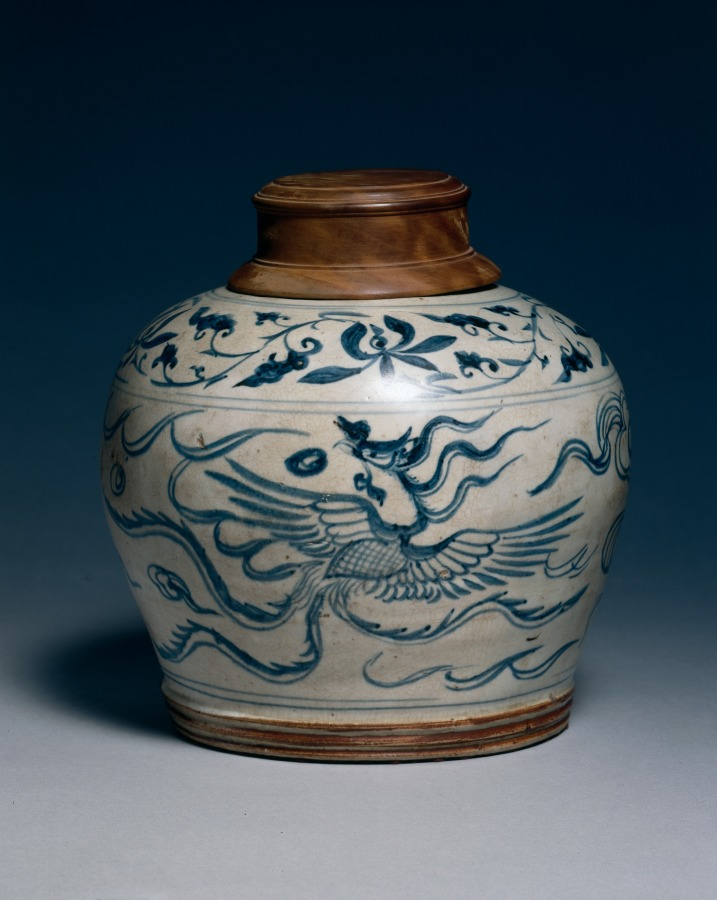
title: Covered Jar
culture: Vietnam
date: 1500s–1600s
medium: stoneware with blue and white decoration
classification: Ceramic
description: This stoneware ginger jar is decorated with a blue and white phoenix among clouds (a symbol of longevity) and floral motifs.